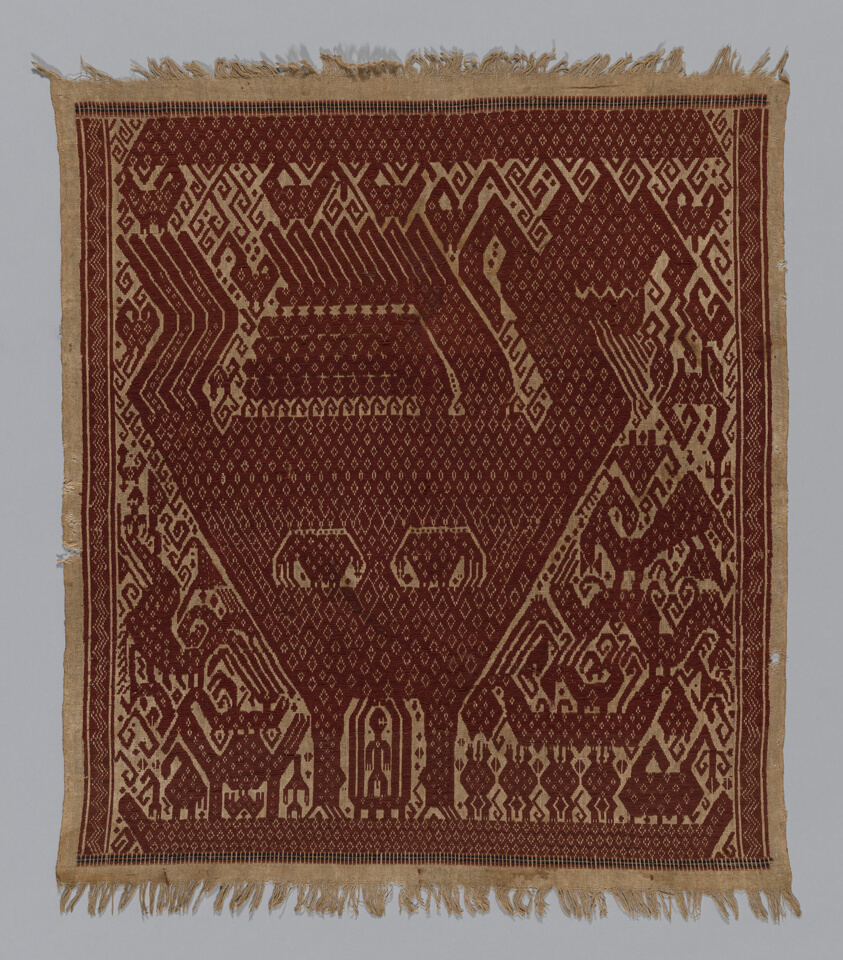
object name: Textile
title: Tampan (Ceremonial Cloth)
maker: Paminggir (Indonesia, South Sumatra, Lampung)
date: 19th century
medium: Cotton, plain weave with supplementary patterning wefts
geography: Indonesia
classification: textile; weaving; costume